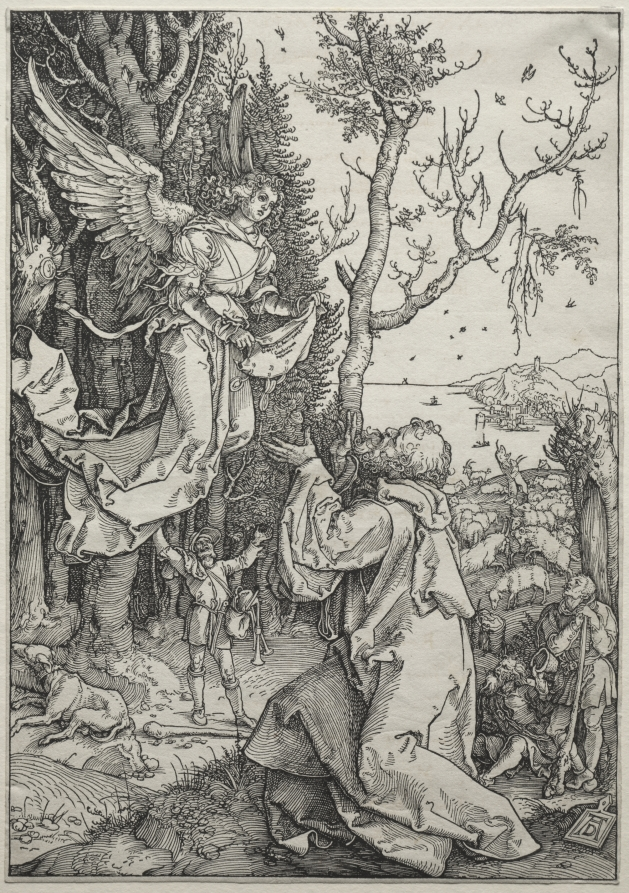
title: The Life of the Virgin: Joachim and the Angel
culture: Germany, early 16th Century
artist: Albrecht Dürer (German, 1471–1528)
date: c. 1504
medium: woodcut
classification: Print